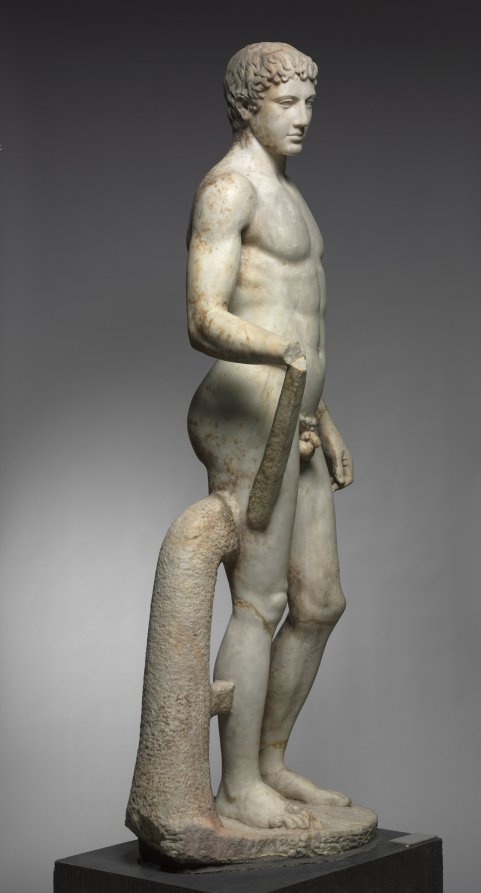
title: Statue of an Athlete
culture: Italy, Roman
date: 1–100 CE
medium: marble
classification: Sculpture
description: This idealized athlete recalls Greek sculptural types invented and popularized during the 400s BC. Large-scale athletes and other sculptures like this were originally created by famous artists as sanctuary dedications. Centuries later, they were widely copied and adapted by Roman sculptors, whose clients sought their own versions of earlier masterpieces. Working in marble rather than bronze, these sculptors added certain elements for stability, such as the struts and the large tree trunk beside the right leg here. Sculptures like this one are profoundly complex, made by and for Romans but descended from Greek ancestors.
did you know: For many years, this sculpture stood in the rotunda of the Cleveland Museum of Art.